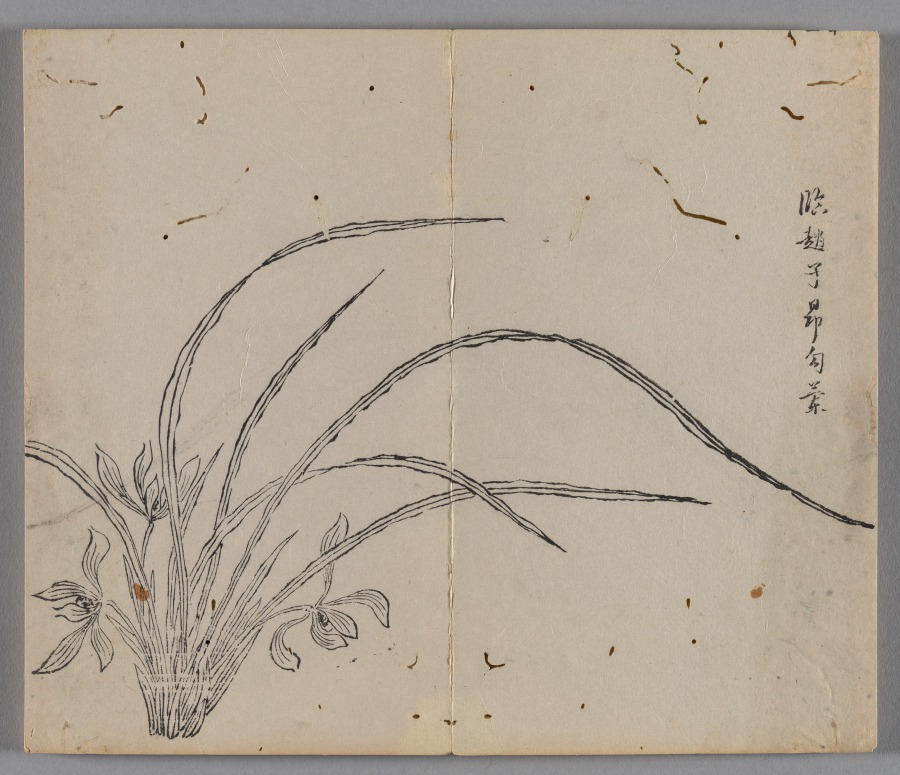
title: Ten Bamboo Studio Painting and Calligraphy Handbook (Shizhuzhai shuhua pu): Orchids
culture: China, Qing dynasty (1644-1911)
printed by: Hu Zhengyan (Chinese, c. 1584–1674)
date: 1633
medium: Woodblock-printed book; ink and colors on paper; first edition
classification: Print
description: Color printing reached a level of perfection in the early 1600s, as seen in this Ten Bamboo Studio Collection of Calligraphy and Painting and the Mustard Seed Garden Manual of Painting (printed 1679 and 1701). The painterly quality, precision in registering (aligning) the woodblocks, and harmonious colors made them the most successful color print editions in Chinese history. Both editions were printed and compiled in Nanjing, spread nationwide, and had a great impact on the arts in Japan and Korea.